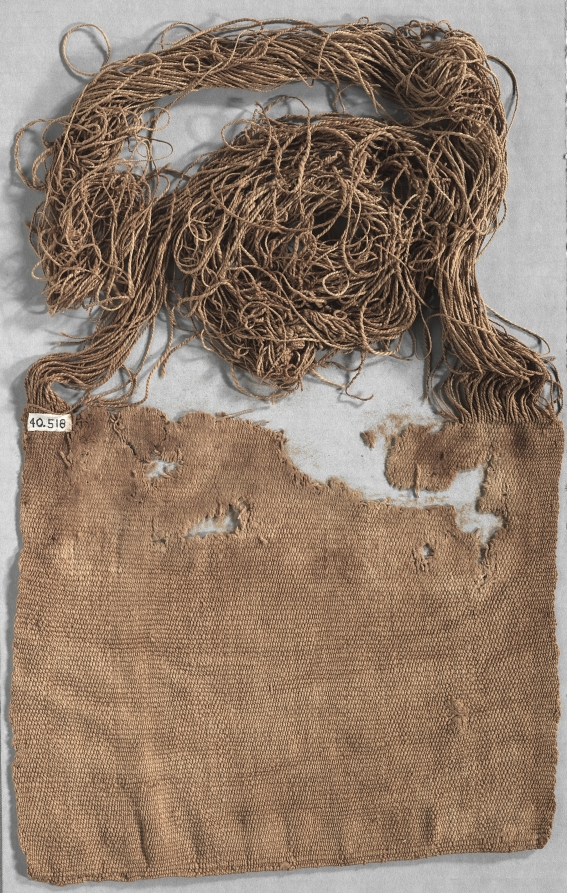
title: Mummy Bundle "Mask"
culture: Peru, South Coast, Ica Valley, Ocucaje site, Paracas style (700 BCE–1 CE)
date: 200 BCE–1 CE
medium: warp-faced cloth, painted: cotton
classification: Textile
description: The Paracas people of Peru's South Coast buried their dead in pear-shaped mummy bundles made of a seated human body carefully wrapped in garments and other textiles. Sometimes a painted cloth was placed at the top of the bundle, as though it served as the bundle's face, head, or "mask." The cloth was padded on the back so it curved outward like a face, and the tress-like yarns (unwoven warps) at the upper edge were arranged around a solid cotton disk that, in turn, was wrapped with a headband. Some cloths were painted with mask-like faces, and others with full figures, apparently mythical creatures.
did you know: These masks fall into two categories, those with only a face and those with a full-bodied figure.